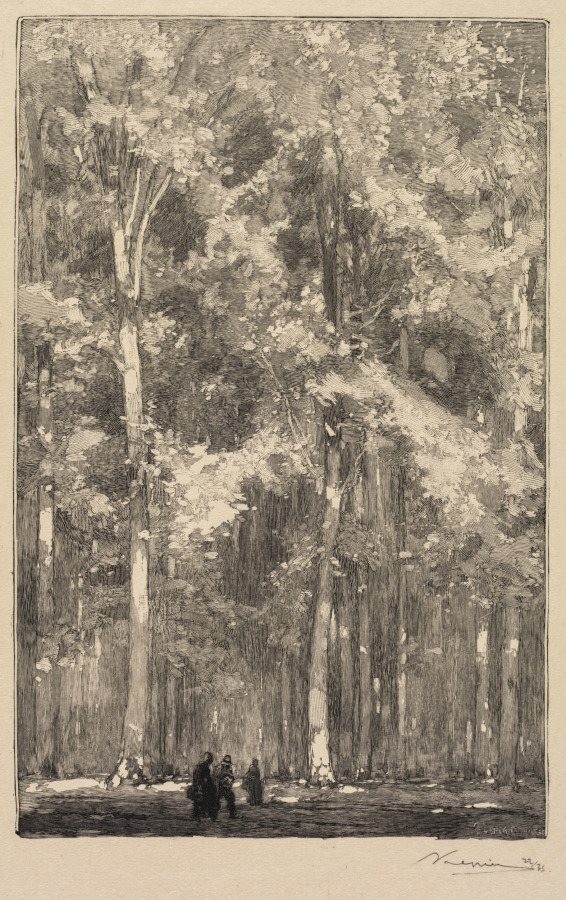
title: Fontainebleau Forest: Morning, Crossroads of the Route of the Forts de Marlotte (La Forêt de Fontainebleau: Le Matin, Carrefour des Fort de Marlotte)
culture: France, 19th century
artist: Auguste Louis Lepère (French, 1849–1918)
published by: A. Desmoulins, Published in Revue Illustrée, 1887–90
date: 1890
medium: wood engraving from bound volume of 34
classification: Bound Volume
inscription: On block, lower right: A LEPERE; below image, lower right, in black ink: ALepère 22/35; on window mat, lower right, in graphite: Le matin, carrefour des Fort de Marlotte